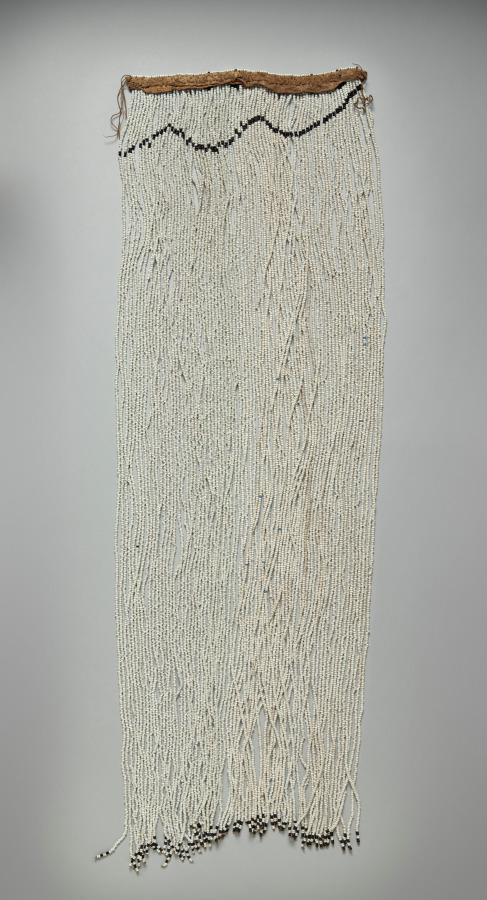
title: Royal ceremonial beadwork: breast cover (incebetha)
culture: Africa, Southern Africa, South Africa, Southeast Cape Region, Unknown female Xhosa-style maker(s)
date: 1800s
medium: Glass beads, hide, and sinew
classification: Textile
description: Elite Xhosa women once wore beaded garments like this on festive occasions. Made almost completely from imported Venetian or Bohemian glass beads, they were overt status symbols. Imported beads functioned as money for the Xhosa between about 1770 and 1829. These garments’ female maker carefully selected beads of the highest quality, uniform in color, shape, and size. Made in the same shape as the pendant, a swallowtail-shaped apron (CMA 2010.206) worn under the skirt completed the ensemble.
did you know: The beads to make an ensemble like this cost several cattle in the early nineteenth century, an amount most couldn't afford.